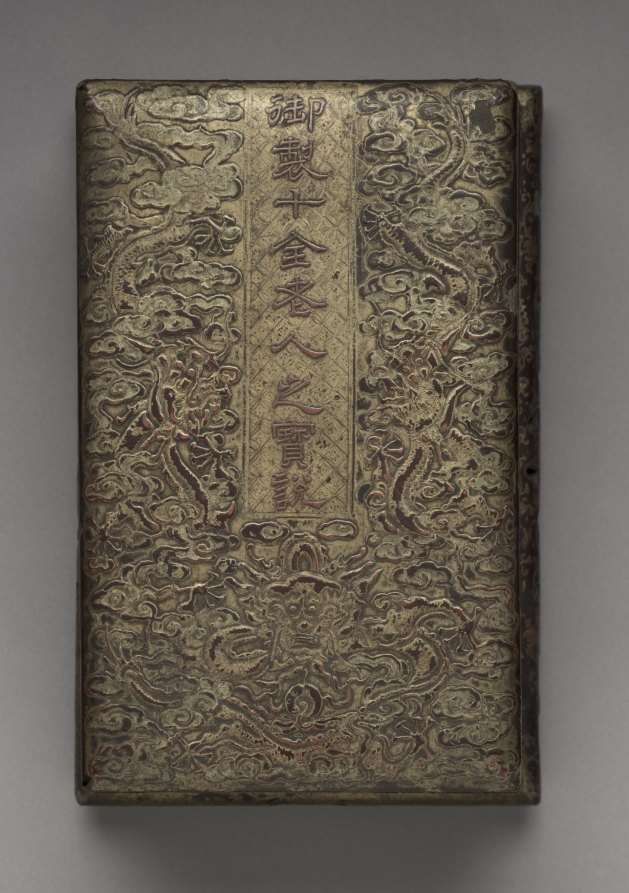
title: Box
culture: China, Qing dynasty (1644-1911)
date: 1750–99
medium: pressed sizing on wood painted with lacquer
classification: Lacquer